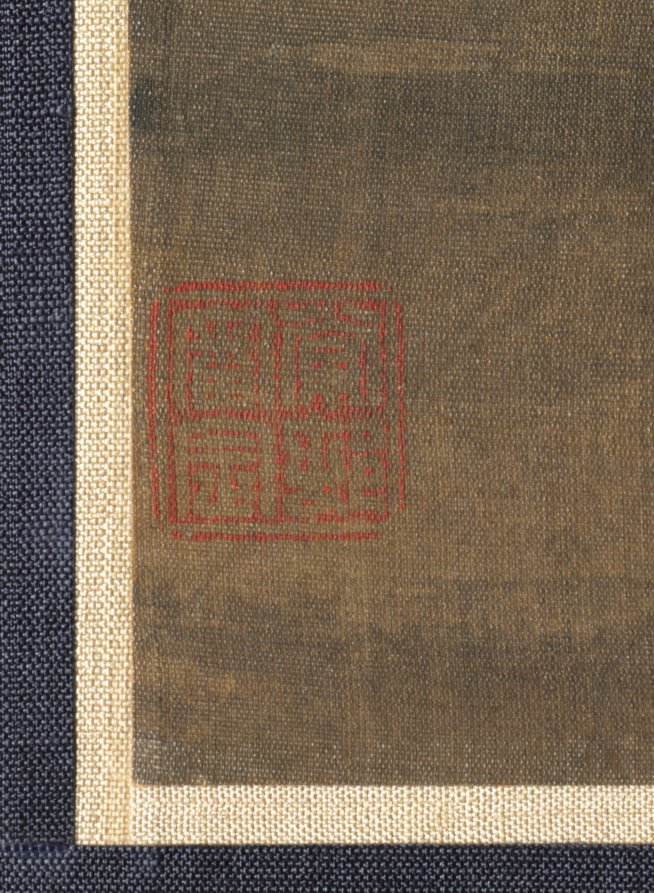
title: Buddhist Retreat by Stream and Mountains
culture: China, Northern Song dynasty (960-1127)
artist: Juran (Chinese, active 960–985)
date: 960–85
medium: Hanging scroll; ink on silk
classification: Painting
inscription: The upper portion of the scroll: the two small characters, “Ju wu 巨五”, written near the large seal. Written by a functionary in Shang Shu Sheng (the Department of State Affairs) when the painting was first received.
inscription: The upper portion of the scroll: the large seal, “Shang Shu Sheng yin 尚書省印” (seal of the Department of State Affairs)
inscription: The upper portion of the scroll: the half-seal “Si yin 司印”, seen along a border. Attributed to 典禮紀察司 of Ming dynasty.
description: Monk Juran served the Southern Tang (937–75) imperial house in Nanjing, where he studied with Dong Yuan (active 930s–60s). Both founded the southern landscape tradition, or Jiangnan school, known for gentle misty riverscapes in wet ink. Juran moved north to Kaifeng when the Southern Tang surrendered to the Northern Song, the impact of which may be seen in this painting, presumably painted after 976. A towering mountain dominates the composition, typically representing the style of the Northern Song academy; while the use of long hemp fiber strokes to texture the mountains, wet dots, and round boulders on mountain tops are elements of the southern landscape tradition.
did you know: This hanging scroll with the towering mountain is a prime example of the monumental landscape style of Northern Song.